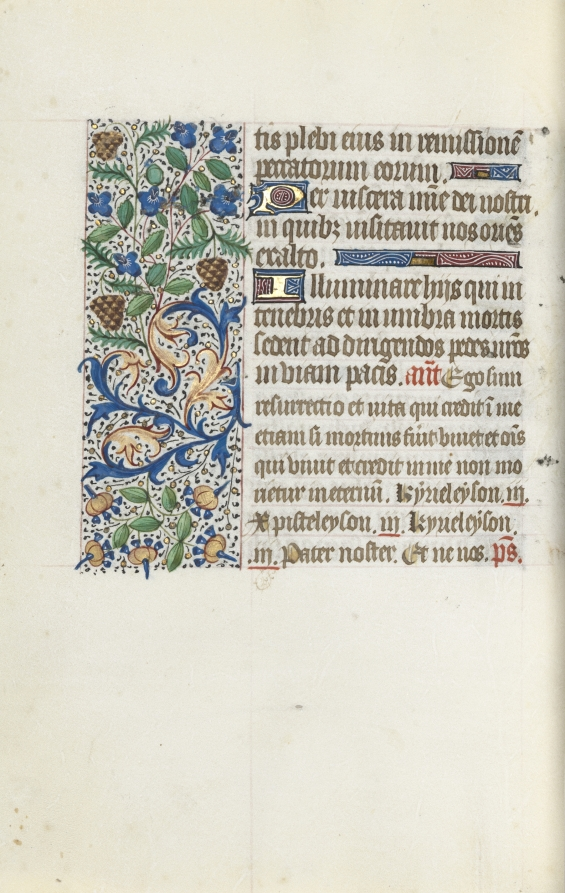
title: Book of Hours (Use of Rouen): fol. 144v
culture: France, Rouen, 15th century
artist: Master of the Geneva Latini (French, active Rouen, 1460–80)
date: c. 1470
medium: ink, tempera, and gold on vellum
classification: Bound Volume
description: In the late 1400s and early 1500s Rouen was an established and important center of book production. The city’s cathedral had a wealthy chapter that spent large sums of money to commission books and to maintain its extensive library. The stationers and booksellers would have likely been concentrated in or near the cathedral precinct. This artist, named after a manuscript now in Geneva, was Rouen’s principal illuminator during the second half of the 1400s.